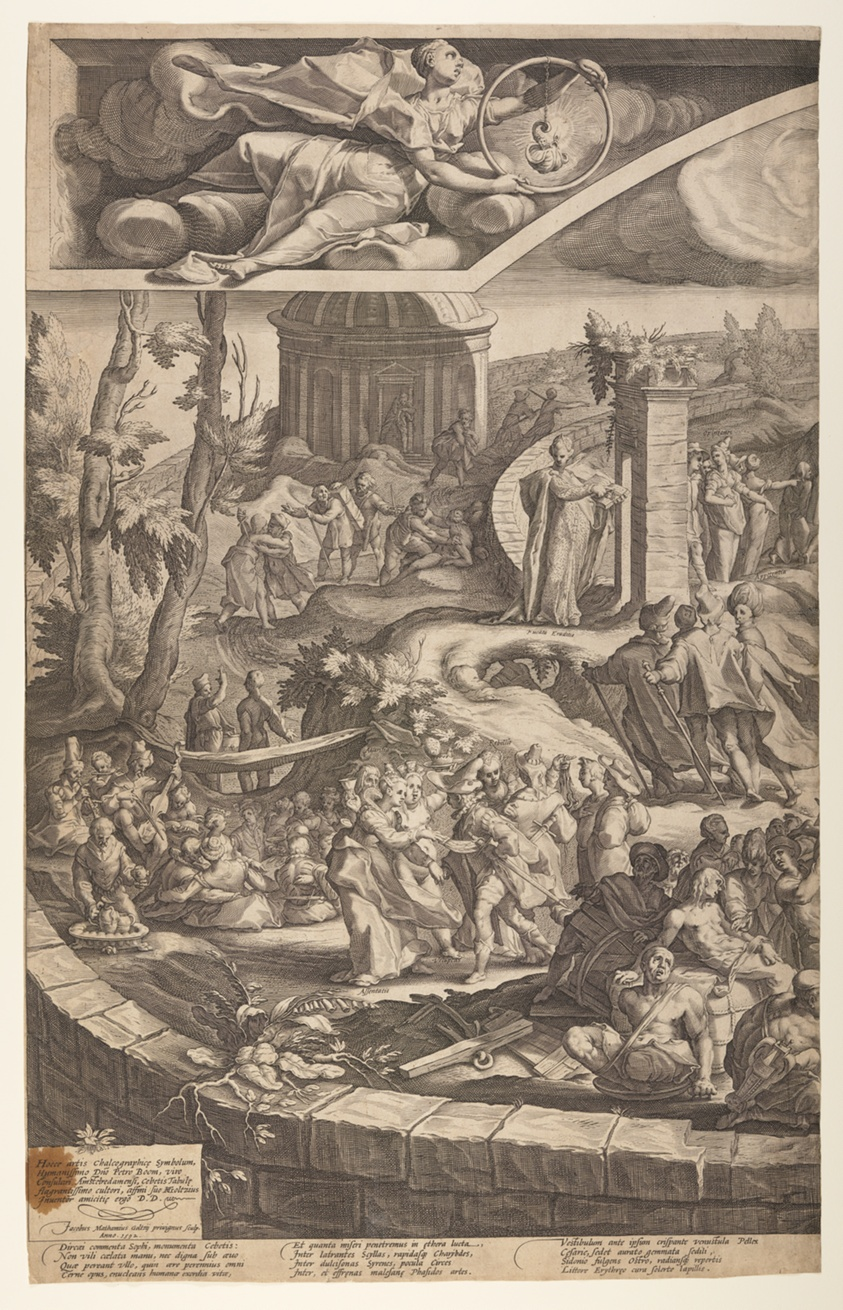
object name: Print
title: The Table of Cebes (plate 1)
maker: Jacob Matham (Dutch, 1571–1631); after Hendrick Goltzius (Dutch, 1558–1617)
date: 1592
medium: Engraving on ivory laid paper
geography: Netherlands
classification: engraving; paper; print; prints and drawing